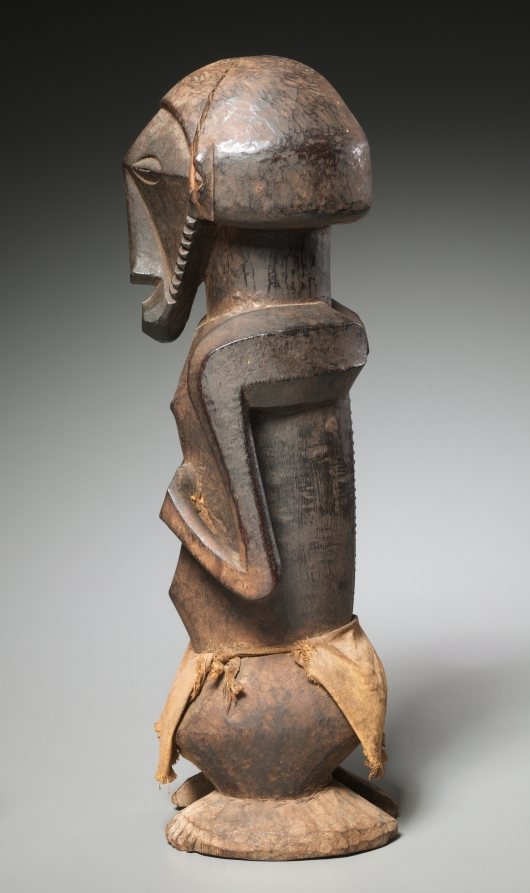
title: Shrine Figure (misi or mishi)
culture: Africa, Central Africa, Democratic Republic of Congo, pre-Bembe style or Boyo-style maker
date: late 1800s-early 1900s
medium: Wood and cotton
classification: Sculpture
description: This figure was used in an ancestral cult dedicated to the founders of small political groupings. Such figures were usually kept in the same shrine with a number of stylistically related male and female carvings that represented ancestors. At times of crisis, the custodian of the shrine spent the night in close proximity to the images, bringing offerings to the ancestors in exchange for their support.